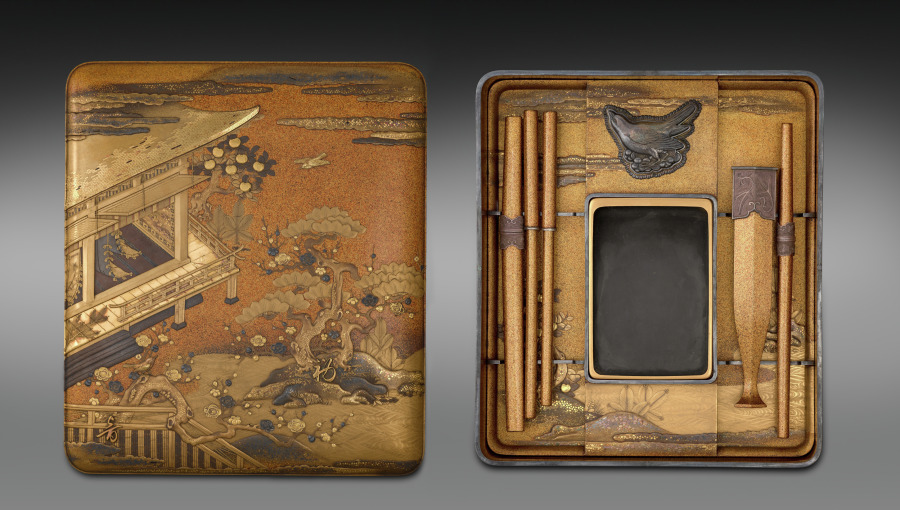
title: Writing Box (Suzuribako) with the “First Song” (Hatsune) Chapter from the Tale of Genji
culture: Japan, Meiji period (1868–1912)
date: early 1900s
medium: Lacquered wood with gold and silver sprinkled powder (maki-e), foil application (kirikane), and metal inlay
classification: Lacquer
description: The design of this box was inspired by an object in the 1639 lacquer wedding set of Chiyohime, the daughter of the shogun (ruler). Information about the set became available in the Meiji period, leading some lacquer artists to emulate its designs. This box features a scene from the chapter “First Song” (Hatsune) of the Tale of Genji, in which Prince Genji and his love Murasaki enjoy her garden. It incorporates the written characters for “first” (初, hatsu) and “sound” (音, ne), indicating the first song of the warbler in spring, associated with the new year—the water dropper for mixing the ink is in the shape of this bird.